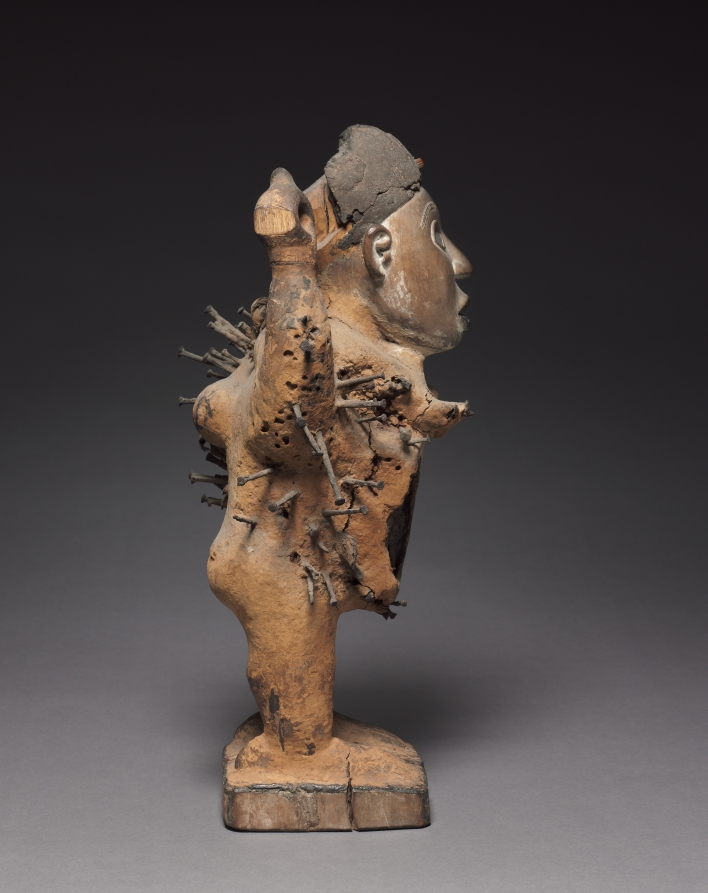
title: Male figure (nkisi nkondi)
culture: Democratic Republic of Congo or Cabinda (Angola), Kongo artist and nganga (priest)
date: late 1800s-early 1900s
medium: Wood, metalized glass, iron, organic material, ivory or plastic, and natural fiber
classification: Sculpture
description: This nkisi nkondi (power figure) lacks most of the materials that transformed it into a vessel for a spirit. Carved by sculptors, minkisi hosted spirits after banganga (priests) placed substances inside to empower them. The mirrored eyes, resin cap, and stomach chamber once contained empowering materials. After the nkisi had served its purpose the nganga removed the materials, stripping it of its spiritual power; the remaining sculpture was discarded. Sometimes, Kongo people removed materials as acts of anti-colonial resistance, disempowering minkisi before Europeans seized them. While we don’t know why it was disempowered, this sculpture is no longer spiritually active.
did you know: A mix of locally made and imported metal nails, blades, and screws cover this figure.